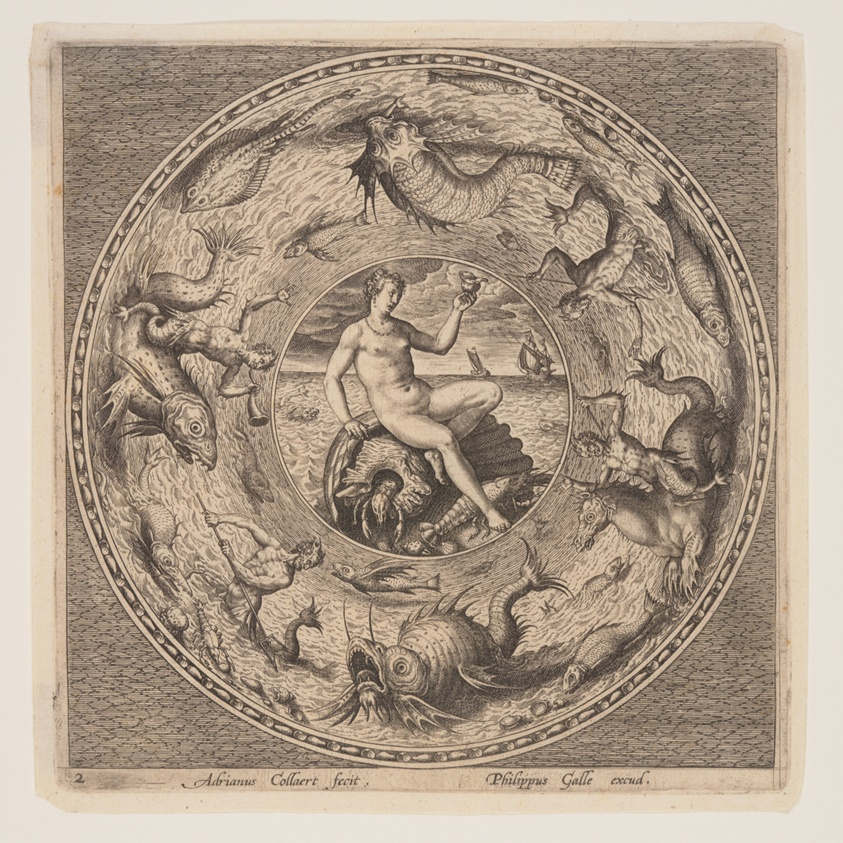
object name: Print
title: Thetis on a Shell, from a Set of Designs for Plates (Fonds de Coupe)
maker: Adriaen Collaert (Flemish, c. 1560–1618); published by Philips Galle (Netherlandish, 1537–1612)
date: c. 1580-1600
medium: Engraving on laid paper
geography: Flanders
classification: engraving; paper; print; prints and drawing